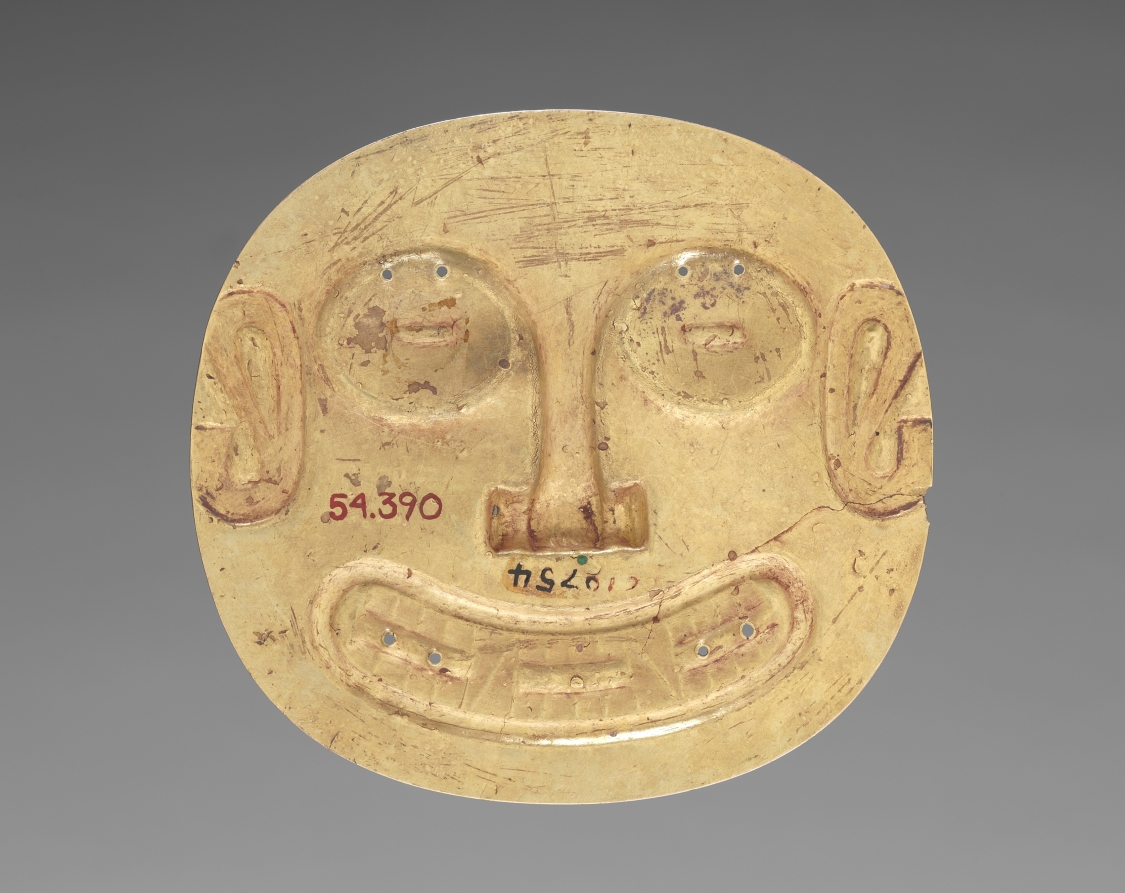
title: Ornament from Sitio Conte: Small Plaque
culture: Panama, Conte style, 5th - 10th century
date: c. 400–500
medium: hammered gold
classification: Metalwork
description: Harvard archaeologists excavated this and seven other ornaments from several burials at Sitio Conte, a cemetery famous for its lavish graves of powerful chieftains. The young man buried in Grave 26 was such a chief. His status was stunningly memorialized by 21 human companions and 475 objects, many of them personal ornaments made of gold, including this large chest plaque and a rod-shaped ear ornament. The creature on the chest plaque, found close to the chief’s body, has reptile claws and perhaps the head crest of an iguana. Its meaning is unknown but perhaps, as in later periods, reptilian imagery and the warm gleam of gold linked rulers with the sun’s creative force.